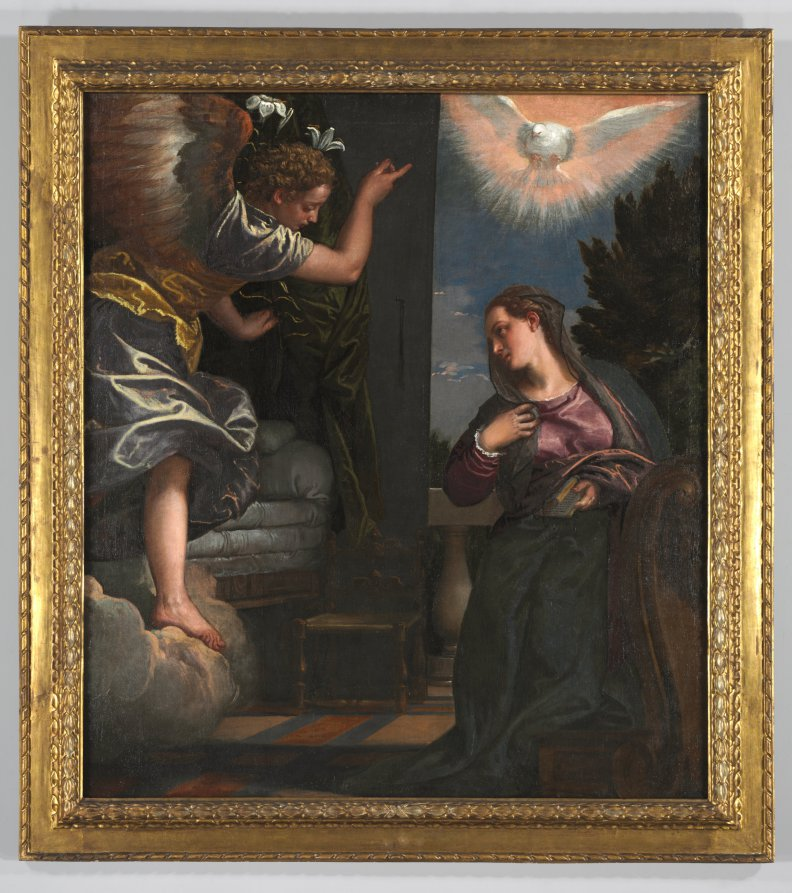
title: The Annunciation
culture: Italy, 16th century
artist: Paolo Veronese (Italian, 1528–1588)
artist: and Workshop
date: c. 1580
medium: oil on canvas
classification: Painting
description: Although Veronese is best known for his large-scale, pageant-like presentations, here the artist has taken the narrative of the Annunciation (the announcement of the angel Gabriel to the Virgin Mary that she would conceive and bear a son) and compressed the figures close to one another, creating a startling intimacy. According to a tradition established by the medieval writer Saint Bernard, Mary has been reading from the Old Testament prophecy of Isaiah (7:14), "A young woman is with child and she will bear a son."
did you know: The white lilies held by Gabriel are a symbol of Mary's purity and innocence, often appearing in depictions of the Annunciation.